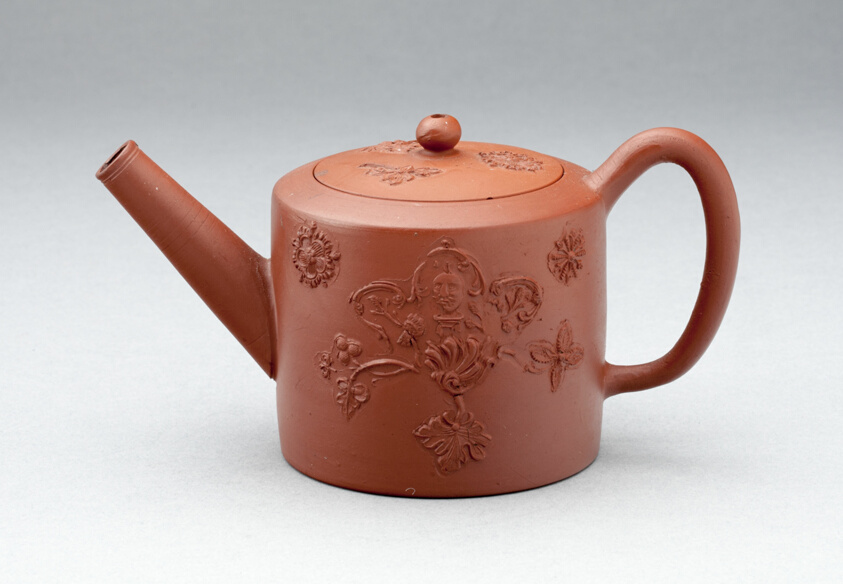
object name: Ceramics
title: Teapot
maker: England, Staffordshire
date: c. 1760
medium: Earthenware (redware)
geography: Staffordshire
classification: teapot; earthenware; ceramics; redware; european decorative arts